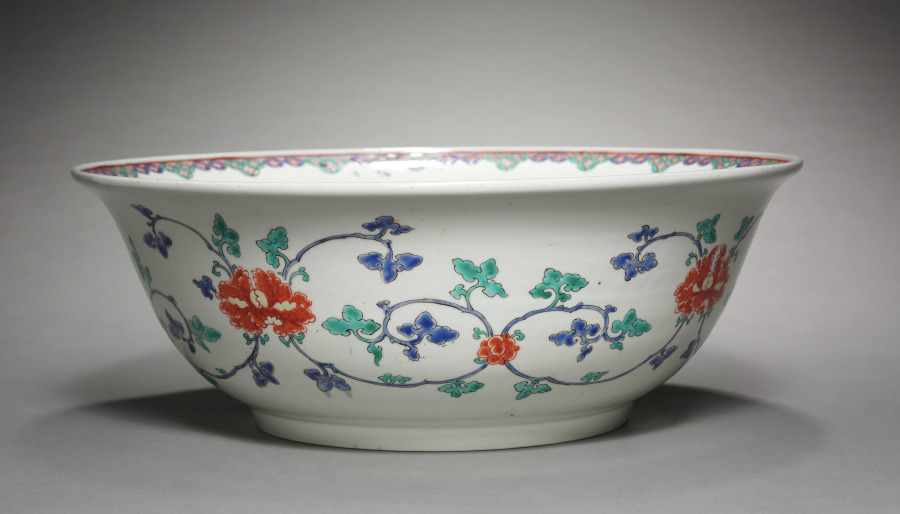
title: Bowl: Kakiemon Ware (2 of 2)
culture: Japan, Edo period (1615–1868)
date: late 1600s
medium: porcelain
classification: Ceramic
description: The Chinese style of decoration identifies this bowl as a product made for the markets in England, Holland, France, and Germany. Here, kakiemon potters rearranged the Chinese literati motifs of the plum, pine, and bamboo. Such kakiemon ware inspired domestic porcelain production in Europe in the 18th and 19th centuries.